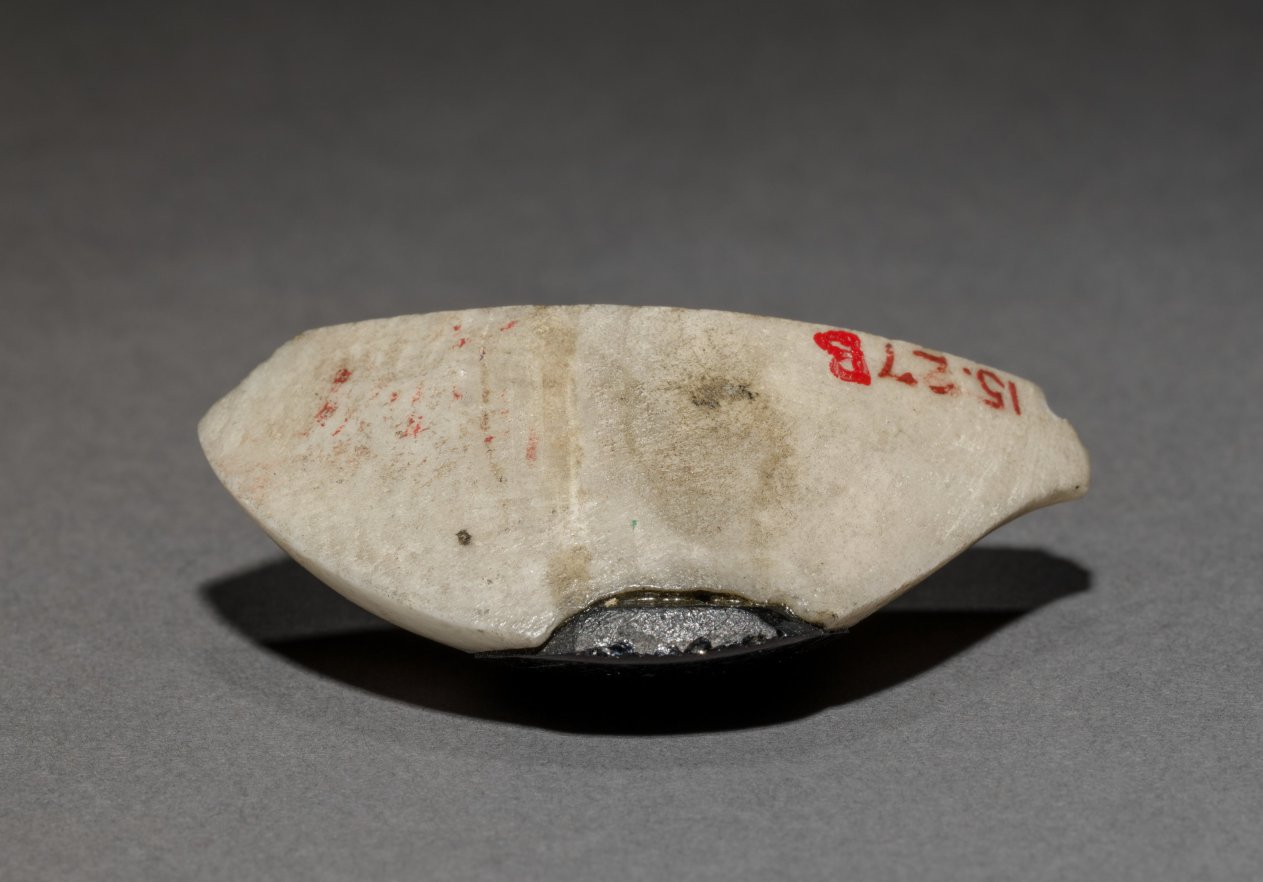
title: Inlay Eye (one of a pair)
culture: Egypt, Haraga, cemetery E, tomb 614, excavated in 1914, Middle Kingdom (2040–1648 BCE), Dynasty 12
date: 1980–1801 BCE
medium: travertine and obsidian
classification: Funerary Equipment